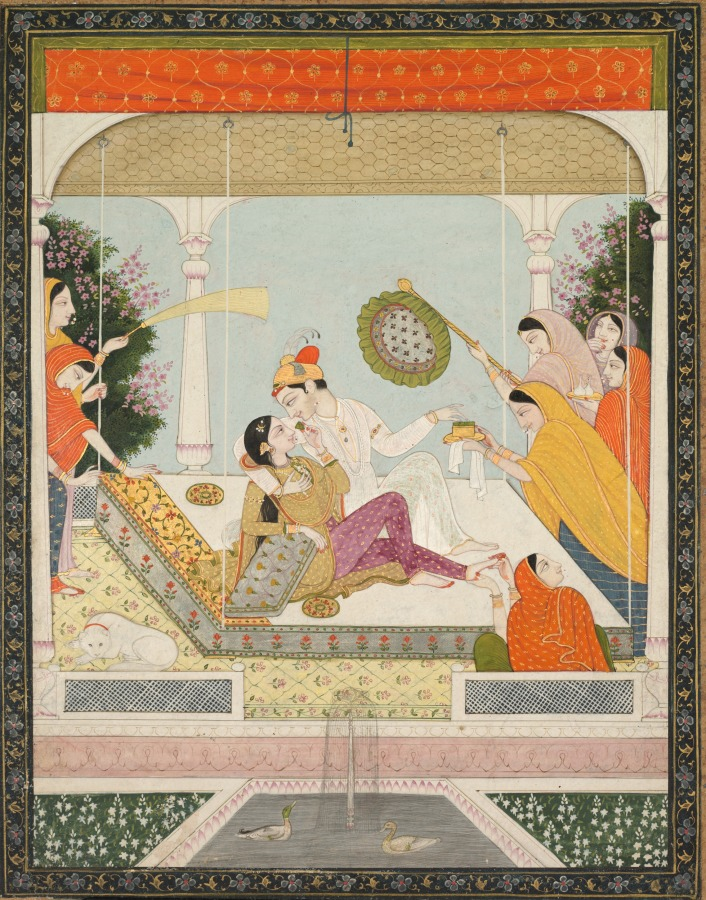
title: Raja with his beloved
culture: Northern India, Pahari kingdoms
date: c. 1790–1800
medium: Gum tempera and gold on paper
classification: Painting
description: The viewer looks through a palace window onto an idyllic scene on an outdoor terrace. A team of attendants minister to a royal couple on a swing. At the upper left one woman keeps flies away with a long-tailed whisk. Next to her, a woman in orange keeps the swing in gentle motion. On the other side, at the lower right, a woman provides a foot massage. At the upper right, one woman holds out a dish of paan; another has small bottles of wine, and another has a fan to provide extra breeze. Finally, a woman in a lavender sari gazes upon the beauty of the scene in admiration.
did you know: The lovers are feeding betel leaf packets (paan), a mild stimulant and breath freshener, to each other.